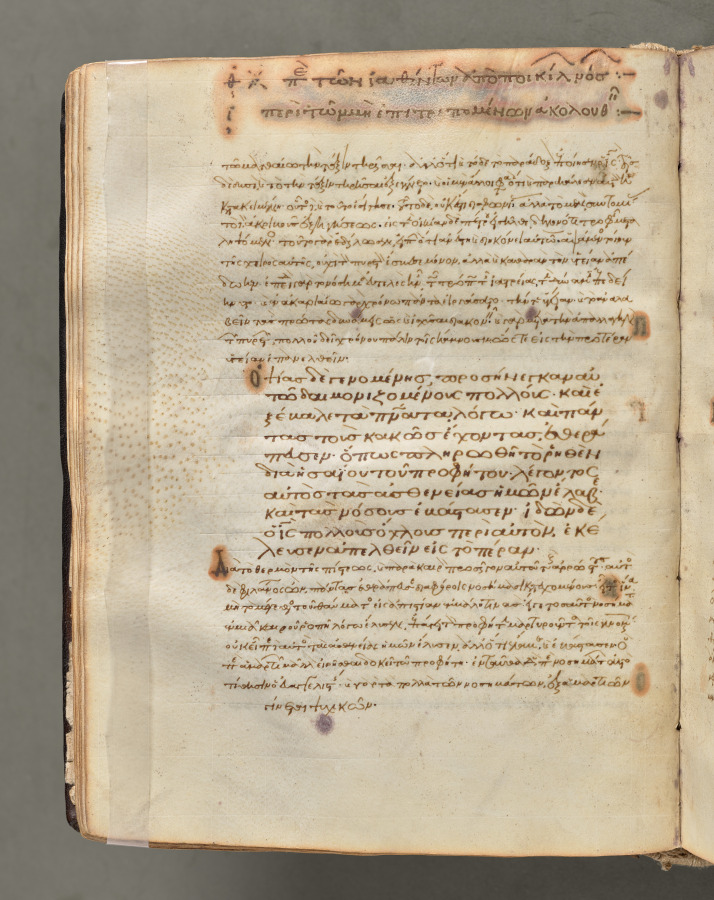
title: Text, folio 34 (verso), from a Gospel Book with Commentaries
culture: Byzantium, Constantinople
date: c. 1000–1100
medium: ink, tempera, and gold on vellum; leather binding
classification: Bound Volume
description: Each of the four gospels in this book opens on a page with brilliantly illuminated borders depicting the author of the text as well as birds—principally peacocks, symbols of the immortality of the soul—and fountains, representing the fountain of life and the salvation of the soul. This volume consists of 428 leaves with texts in Greek. Its level of sophistication suggests that it was probably written and decorated in a monastery in Constantinople.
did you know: Gospel Books were carried in procession through Byzantine churches.